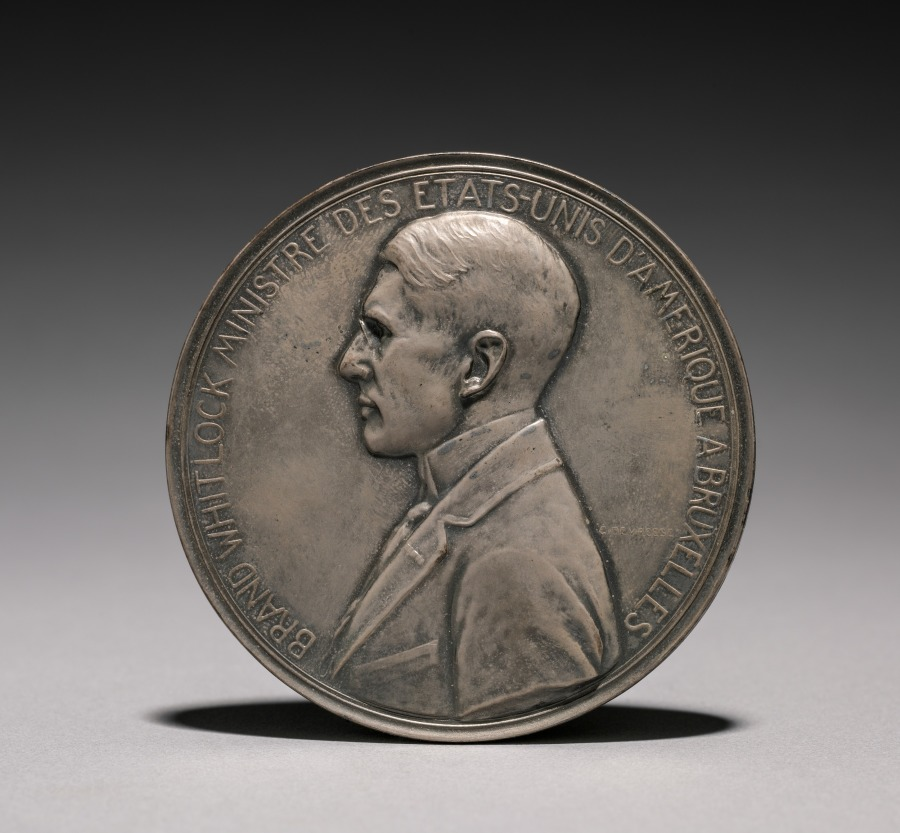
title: Medal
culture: Belgium, 20th century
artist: Godefroid Devreese (Belgian, 1861–1941)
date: 1914–1915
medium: bronze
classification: Metalwork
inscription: "Brand Whitlock ministre de Etats-unis D'Amerique a Bruxelles."